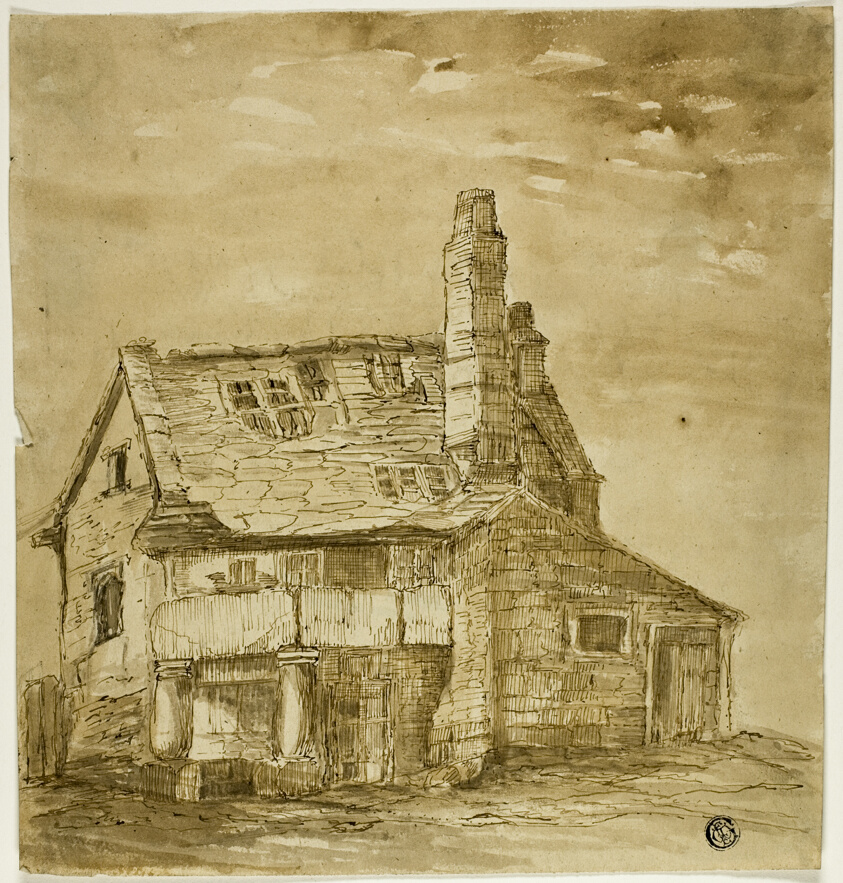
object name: Drawing and Watercolor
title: Old Farmhouse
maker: Unknown Artist; Dutch, 18th century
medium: Pen and brown ink, with brush and brown wash, and touches of graphite, on cream wove paper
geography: Holland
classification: pen and ink drawings; drawings (visual works); prints and drawing